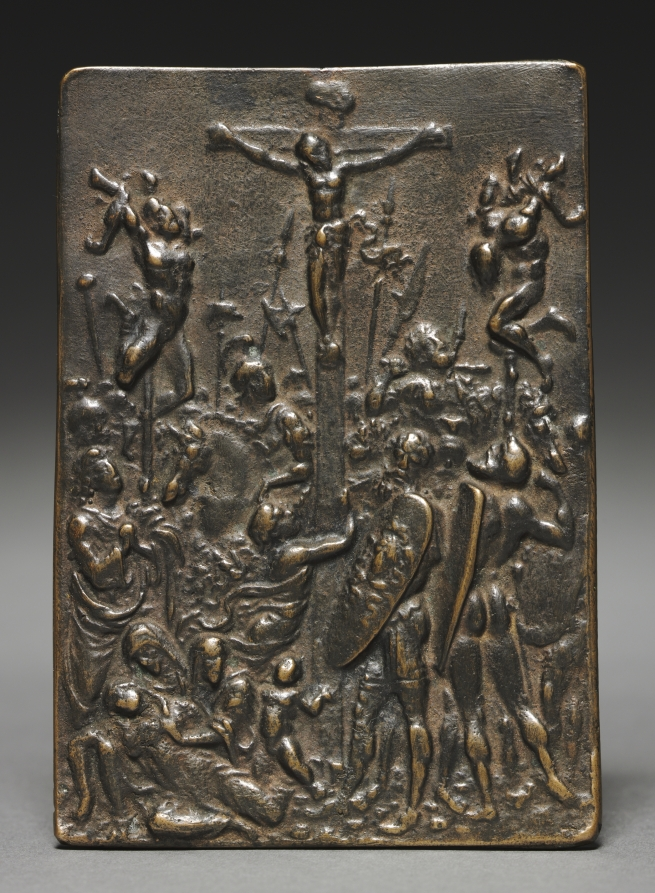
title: The Crucifixion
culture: Italy, 16th century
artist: cast after a model by Moderno (Italian, 1467–1528)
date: 16th century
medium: bronze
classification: Sculpture